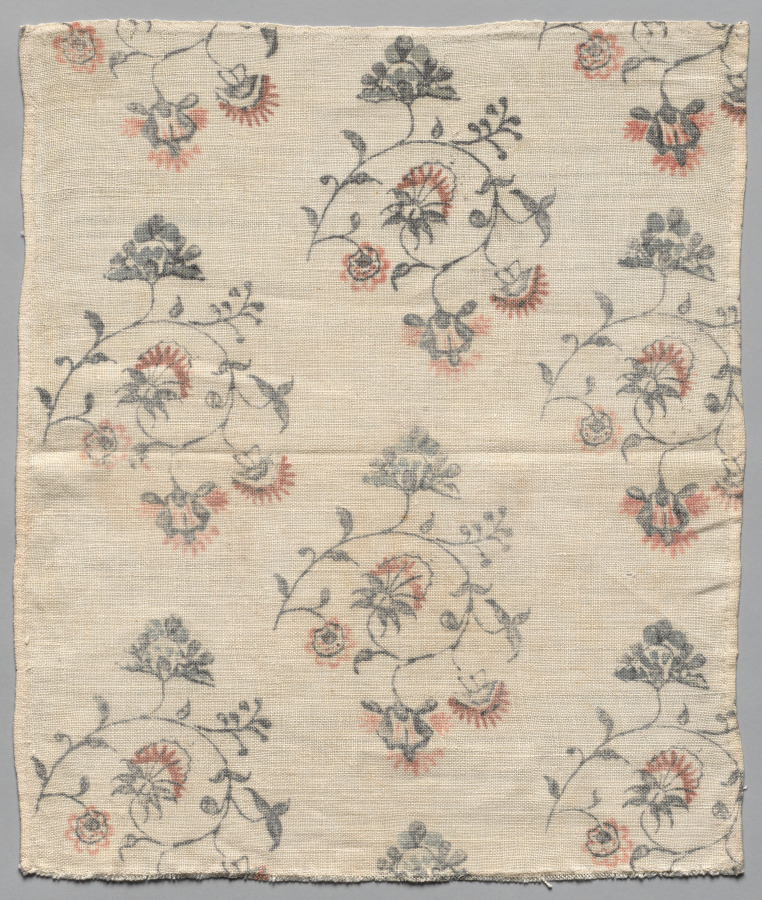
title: Textile Fragment of Painted Linen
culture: America, Massachusetts, Ashfield, early 19th Century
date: c. 1800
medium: painted linen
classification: Textile